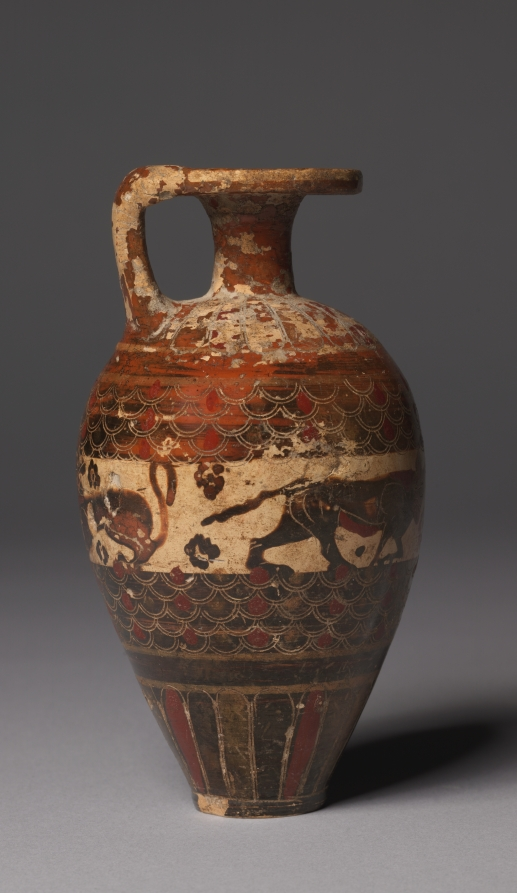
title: Protocorinthian (Early Black-Figure) Aryballos (Oil Flask): Animals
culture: Greek, Corinthian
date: c. 650–640 BCE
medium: ceramic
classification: Ceramic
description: Tongues encircle the rim, shoulder, and base of this small oil vessel, while two carefully incised bands of scales frame an animal frieze. Here, amid dot rosettes, are a bull, dog, and goat, all facing right, and a left-facing lion with head turned back. The black glaze has misfired red in many places, while added red enlivens numerous tongues, scales, and internal details.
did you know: Artists may have used a compass-like tool to create the intricate scale patterns.